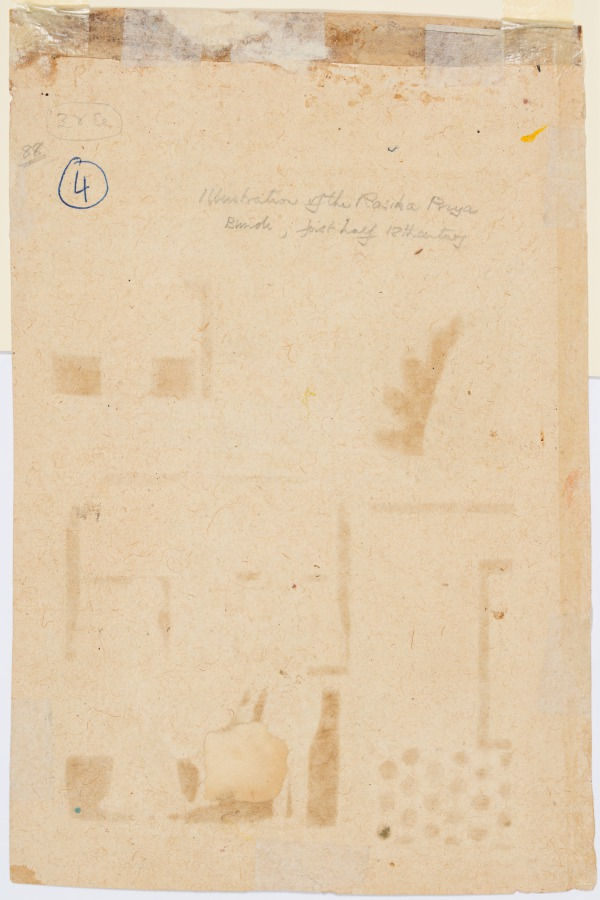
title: Krishna and Radha Quarreling: Shatha Nayaka, from a Rasikapriya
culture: Northwestern India, Rajasthan, Rajput Kingdom of Bundi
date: c. 1680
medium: Gum tempera and gold on paper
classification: Painting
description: When Krishna returns home at dawn, having spent the night elsewhere, an infuriated Radha inquires about his whereabouts and accuses him of infidelity. Krishna, realizing the intensity of the situation, tries to assuage her with sweet words and compares her red eyes to lotus petals. The rising sun behind the thick foliage is suggestive of early dawn.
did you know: Krishna wears a transparent white muslin jama, a popular article of Mughal fashion since the time of Emperor Jahangir (r. 1605–27).